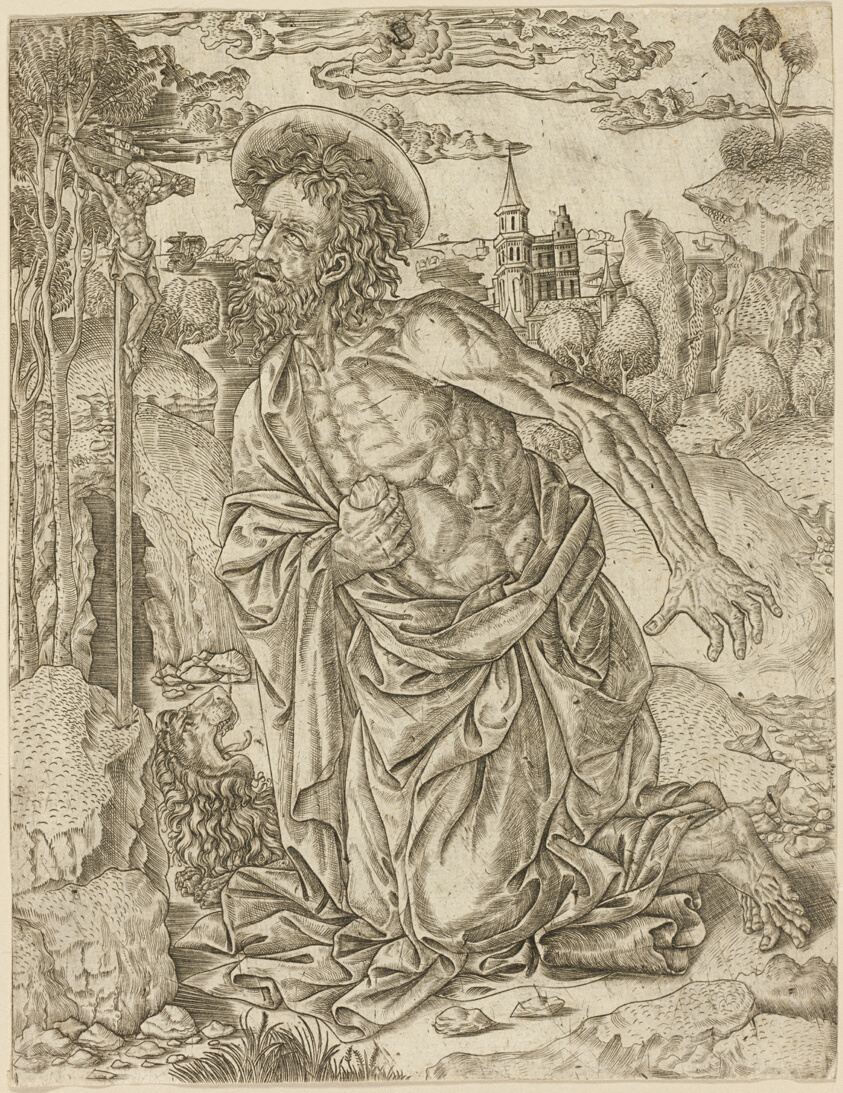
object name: Print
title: St. Jerome in Penitence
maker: Unknown artist (Italian, 15th-16th centuries)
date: c. 1500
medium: Engraving printed in black on paper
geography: Italy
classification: engraving; print; prints and drawing